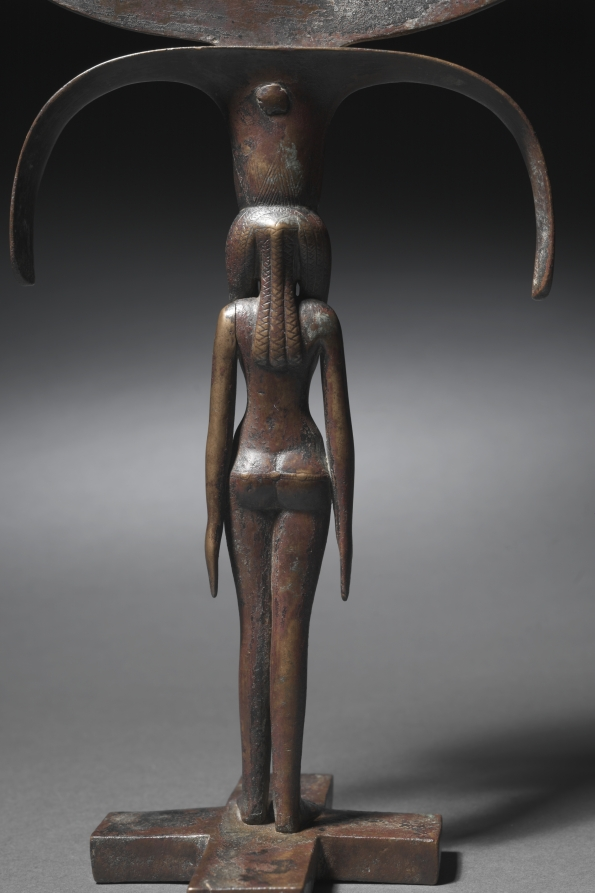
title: Caryatid Mirror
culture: Egypt, New Kingdom (1540–1069 BCE), Dynasty 18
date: c. 1540–1296 BCE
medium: bronze with black copper inlay?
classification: Cosmetic Objects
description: This superb mirror has an oval disk and a handle in the form of a nubile young girl, entirely naked except for her elaborately braided tripartite wig, broad collar, and a girdle of wallet beads. She stands on a cruciform base, with her left foot slightly advanced and her hands at her sides. On her head and supporting the disk is a papyrus umbel with flaring tips. Mirrors with handles in the form of naked young girls were the height of fashion in mid-Dynasty 18; numerous examples exist. This mirror is perhaps the finest of its kind. The cruciform base is unusual, if not unique. The iconography is understandable in relation to the goddess Hathor, the embodiment of love and beauty. A multifaceted goddess, she was equated with Aphrodite by the Greeks. The retinue of Hathor consisted precisely of such beauties, called nefrut in Egyptian, and the mirror itself, that reflection of beauty, appears to have had Hathorian connections from early times.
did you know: When they were made, this mirror was polished to a brilliant shine; the marvelous colored patina it has since acquired is the result of being buried for years in the ground.